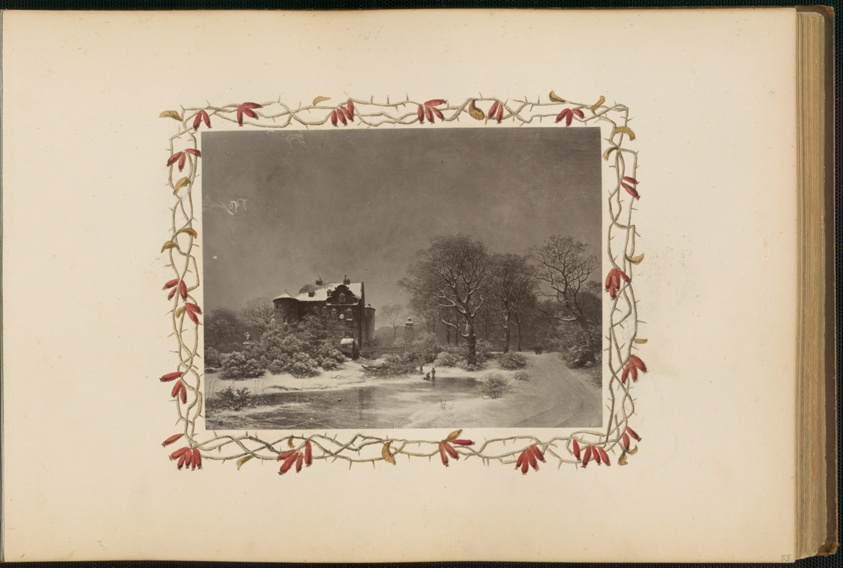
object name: Photograph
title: The Madame B Album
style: 19th century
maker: Marie-Blanche Hennelle Fournier (French, 1831–1906)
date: 1870s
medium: Albumen print with watercolor (in album)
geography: France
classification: photograph; albumen silver print; photography